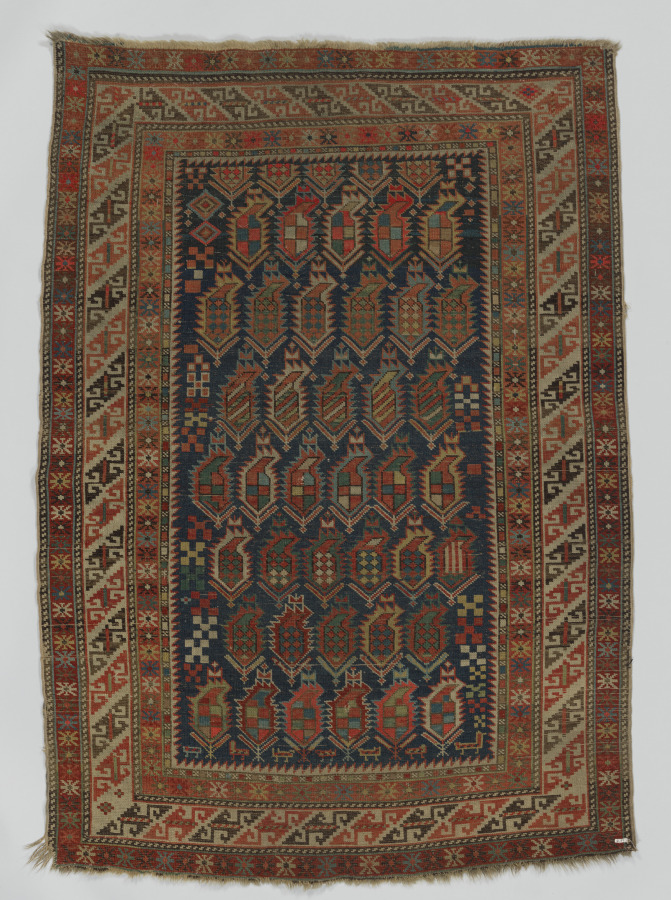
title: Carpet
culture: Dagestan, 19th-20th century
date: 19th-20th century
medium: Ghiordez knot; wool and cotton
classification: Carpet